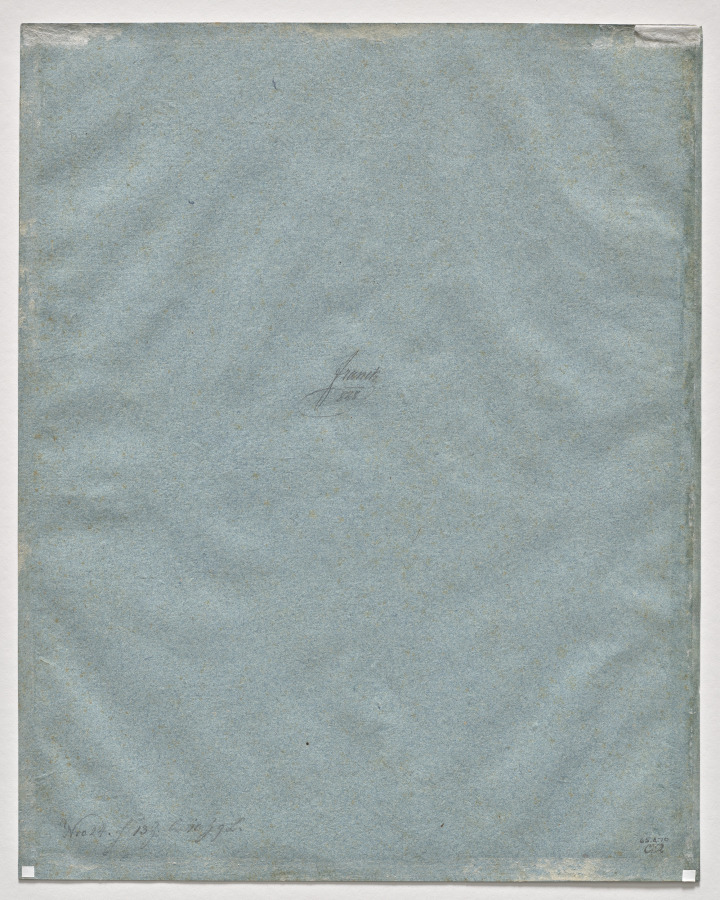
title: Arm of Eve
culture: Germany, Nuremberg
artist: Albrecht Dürer (German, 1471–1528)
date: 1507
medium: point of brush and gray and black wash, brush and gray and black wash, heightened with white gouache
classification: Drawing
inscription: signed, center right, in gray ink: 1507 / [artist monogram: AD]; verso, lower left, in graphite: Nro 24. F 13 z. [bn?] 10zgL.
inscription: Watermark: Anchor (similar to Briquet 461)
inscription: "franck / 828" in graphite, center verso (Lugt 946)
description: Arm of Eve is the only surviving preparatory drawing for Dürer’s life-size panels of Adam and Eve in the Museo del Prado, Madrid. It is also one of the few surviving drawings by the artist made on Venetian blue paper, a support he began to use for his chiaroscuro studies while visiting Venice in the winter of 1506–7. With extraordinary economy of means, using only black and gray ink and a limited amount of wash and gouache for shading and heightening, Dürer suggested the grace and balance of the complete human form in this composition of a disembodied arm and hand. Such a study of a hand in ideal proportions cannot help but suggest the hand of the artist, a self-referential nod to his own abilities.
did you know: The blue paper that Dürer used to make this drawing was a specialty of Venetian paper makers in the 16th century, who achieved the color by infusing the paper pulp with dyed fibers.